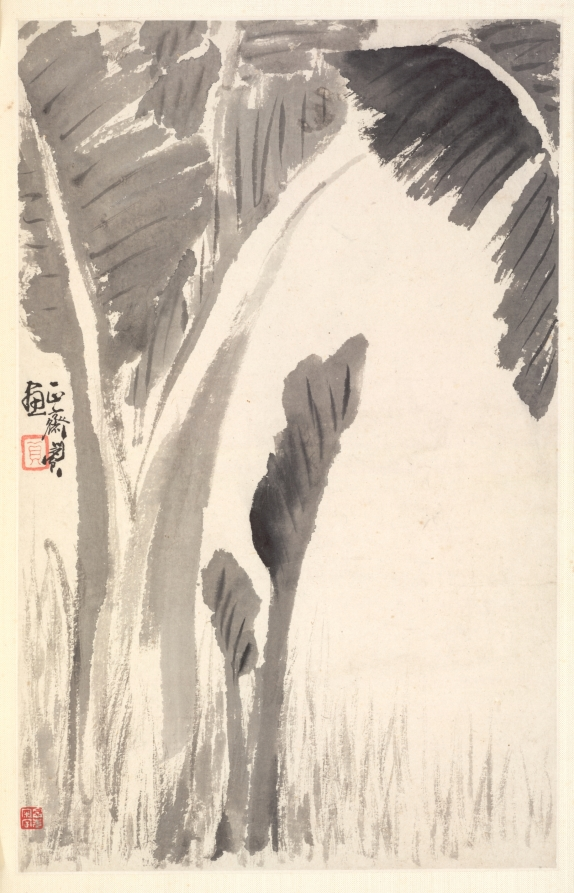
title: Banana Plants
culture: China, Qing dynasty (1644-1911)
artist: Min Zhen (Chinese, 1730–after 1788)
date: 1788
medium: album leaf, ink on paper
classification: Painting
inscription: Six seals appearing on the leaves: Min Zhen 閔貞; Zheng zhai 正齋; Qingqiao 青橋; Zhen 貞; Liao tang 蓼塘; Min Zhen zhi yin 閔貞之印。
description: Min Zhen was trained by Tang Yin (1682–1756), a writer, playwright, and superintendent of the imperial porcelain workshops in Jingdezhen. The connection to him may have enabled Min to stay in Beijing for a decade from around 1773. It is not clear whether he ever resided in Yangzhou, but his style is in many instances reminiscent of that of Yangzhou artist Huang Shen. This album was painted for his friend Dailili Shanren in exchange for a scholar’s stone. The paintings demonstrate the artist’s versatility and mature style in the last years of his life. While two paintings are rendered in unconventional compositions seen from above (Cat and Butterfly CMA 1985.71.5) and below (Banana Plant CMA 1985.71.11), they have a humorous touch. The banana plant stands for the world of literati but can also allude to Buddhism.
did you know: Min Zhen was orphaned at age 12 and developed an eccentric personality,